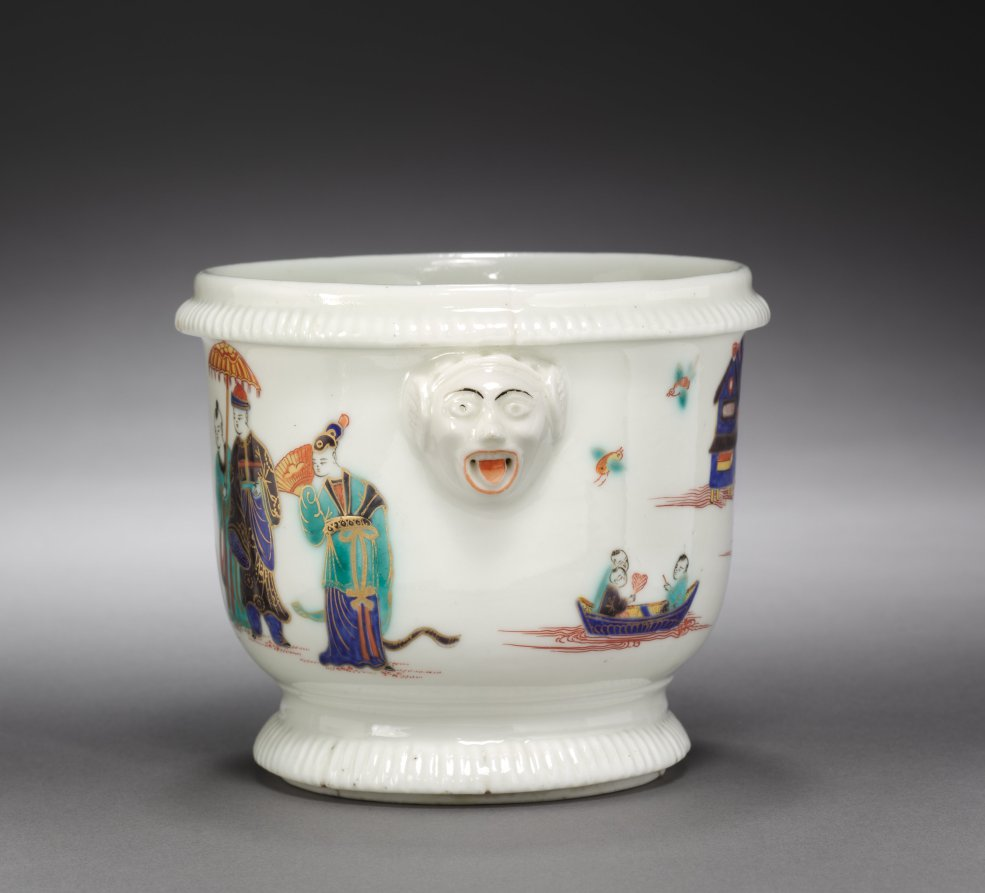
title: Bottle Cooler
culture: France, Saint Cloud, 18th century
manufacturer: Saint Cloud Porcelain Factory (French)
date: c. 1725– 1735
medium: soft-paste porcelain with enamel decoration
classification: Ceramic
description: The form of these cachepots is entirely typical of Saint-Cloud porcelain of about 1725. Their decoration, based upon Chinese porcelains of the so-called "famille-verte" type, is most unusual. Polychromed enamels were not often employed on Saint-Cloud porcelains, and figural scenes are very rare.